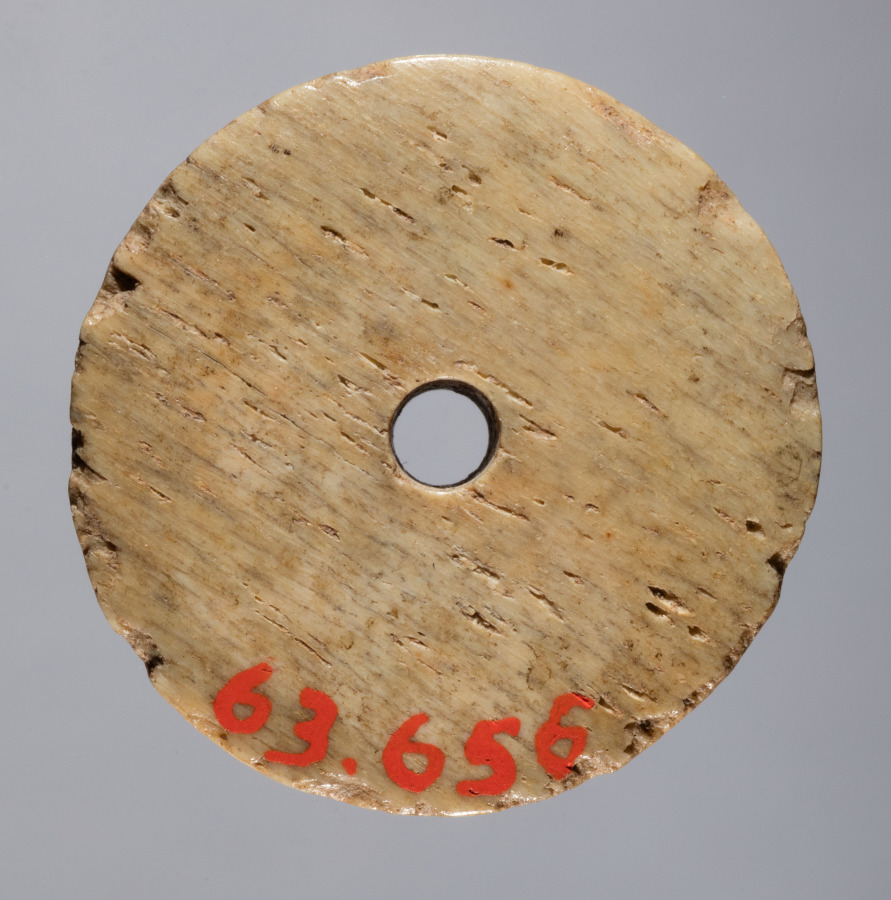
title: Spindle Whorl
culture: Iran, early Islamic period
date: 700s - 900s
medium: bone, incised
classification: Spindle Whorl